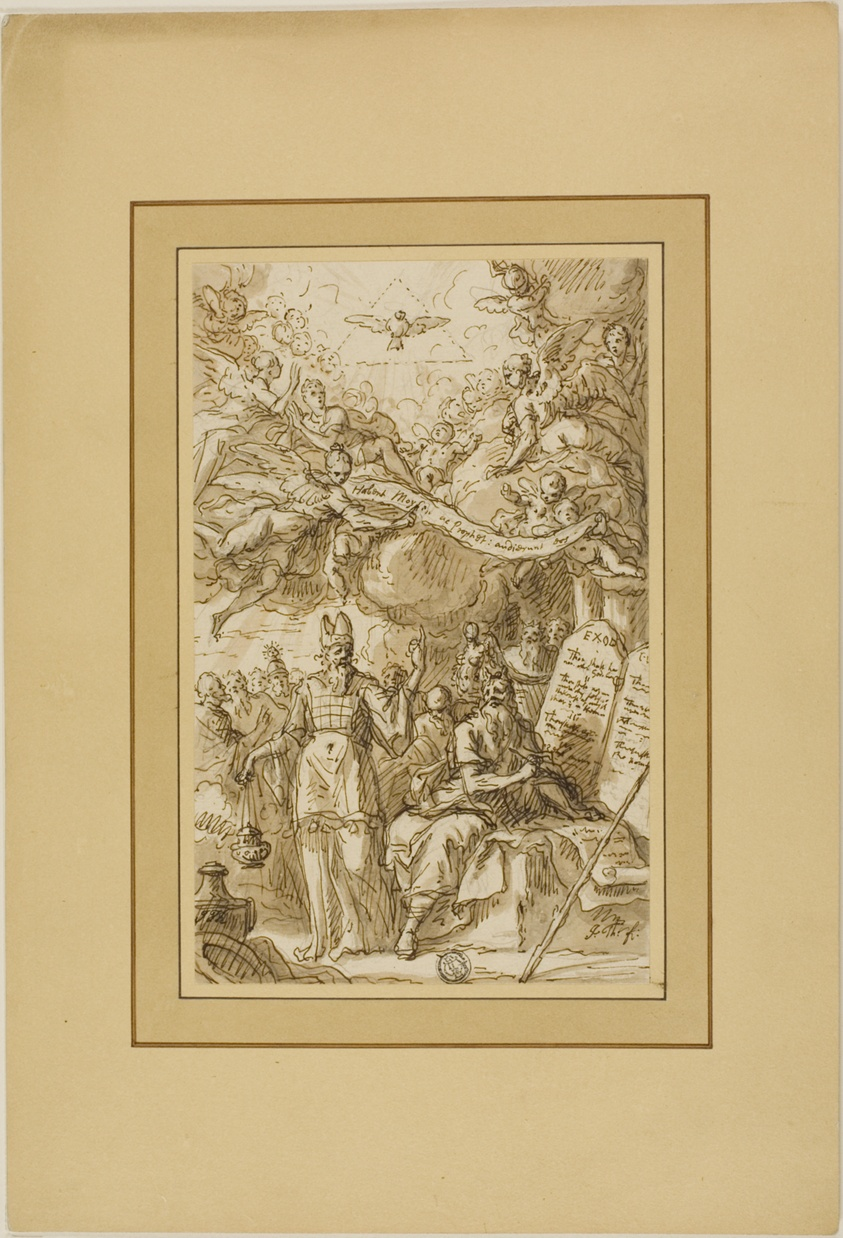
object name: Drawing and Watercolor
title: Moses and the Tables of Law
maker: James Thornhill (English, 1675-1734)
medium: Pen and brown ink with brush and brown wash, over graphite, on ivory laid paper, laid down on card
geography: England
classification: pen and ink drawings; drawings (visual works); prints and drawing